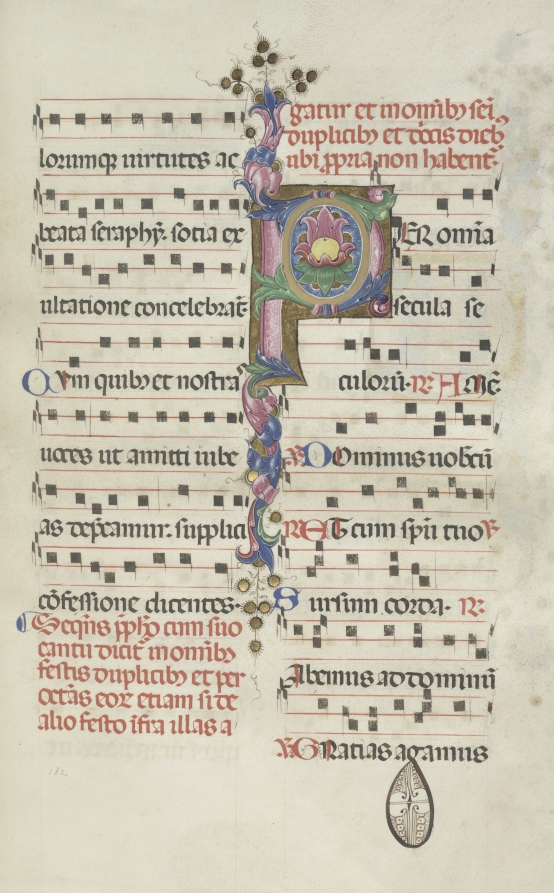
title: Missale: Fol. 184: Foliage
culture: Italy, Perugia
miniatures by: Bartolommeo Caporali (Italian, c. 1420–1503)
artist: assisted by Giapeco Caporali (Italian, d. 1478)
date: 1469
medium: ink, tempera and burnished gold on vellum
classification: Bound Volume